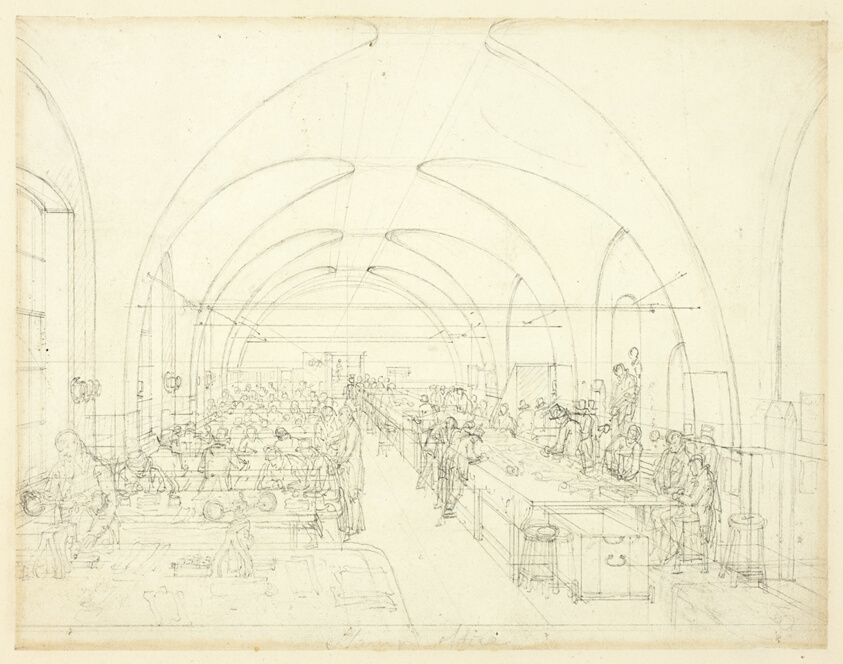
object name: Drawing and Watercolor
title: Study for Stamp Office, from Microcosm of London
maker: Augustus Charles Pugin (English, born France, 1762-1832); Thomas Rowlandson (English, 1756-1827)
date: c. 1809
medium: Graphite on ivory wove paper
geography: England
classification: graphite; drawings (visual works); prints and drawing